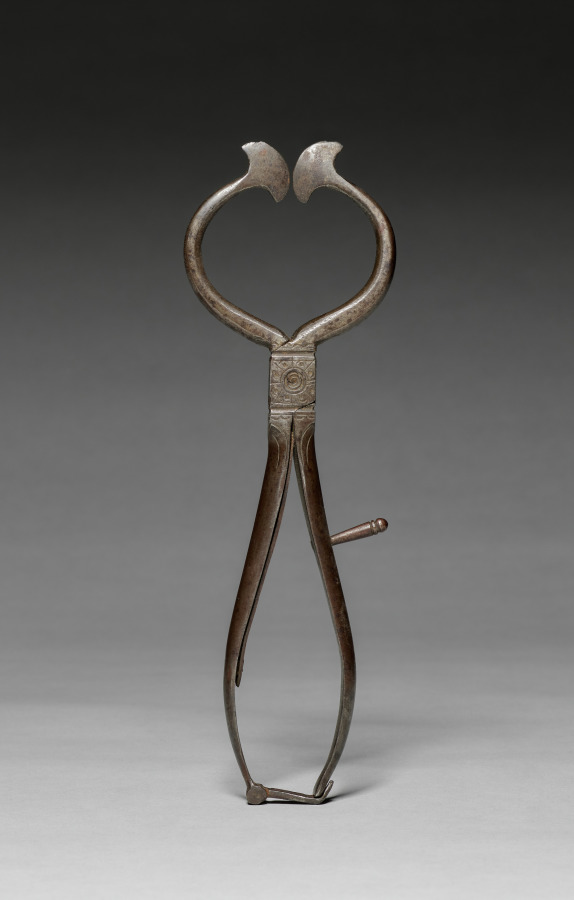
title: Cutting Pliers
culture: Germany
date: 1600s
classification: Tool